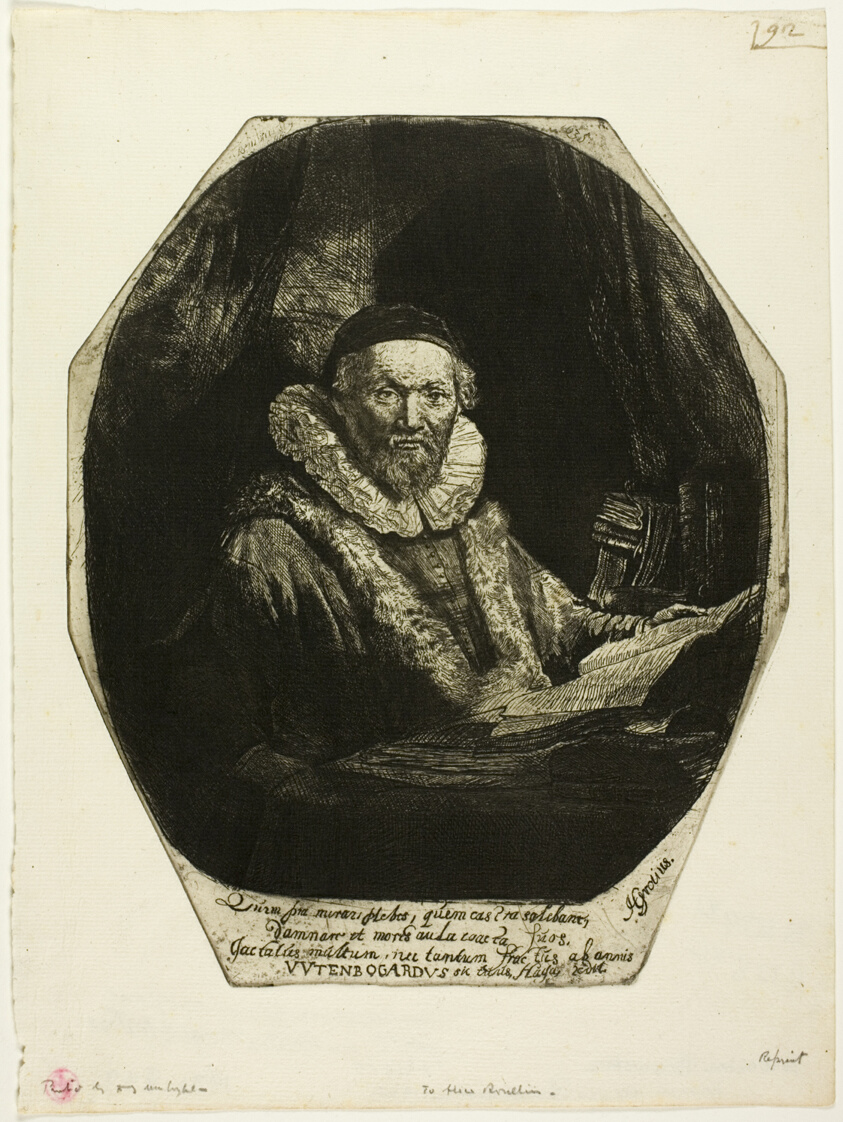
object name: Print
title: Jan Uytenbogaert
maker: Rembrandt van Rijn (Dutch, 1606-1669); printed by Donald Shaw MacLaughlan (American, born Canada, 1876-1938)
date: 1635, printed 1906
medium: Etching in black on cream laid paper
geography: Netherlands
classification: etching; print; prints and drawing; paper